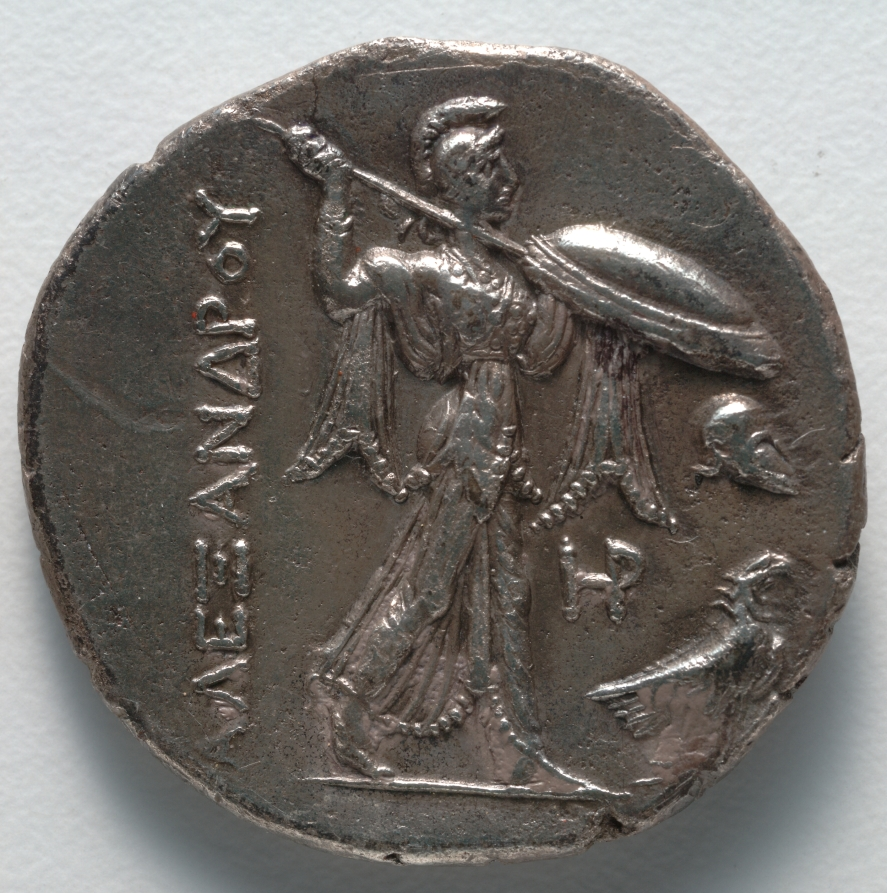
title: Tetradrachm: Athena Promachos, advancing right holding spear and shield; helmet and eagle right (reverse)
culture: Egypt, Greco-Roman period (332 BCE–395 CE), reign of Ptolemy I Soter (303–282 BCE)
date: 310–305 BCE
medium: silver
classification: Coins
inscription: ΗΡ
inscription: ΑΛΕΞΑΝΔΡΟΥ